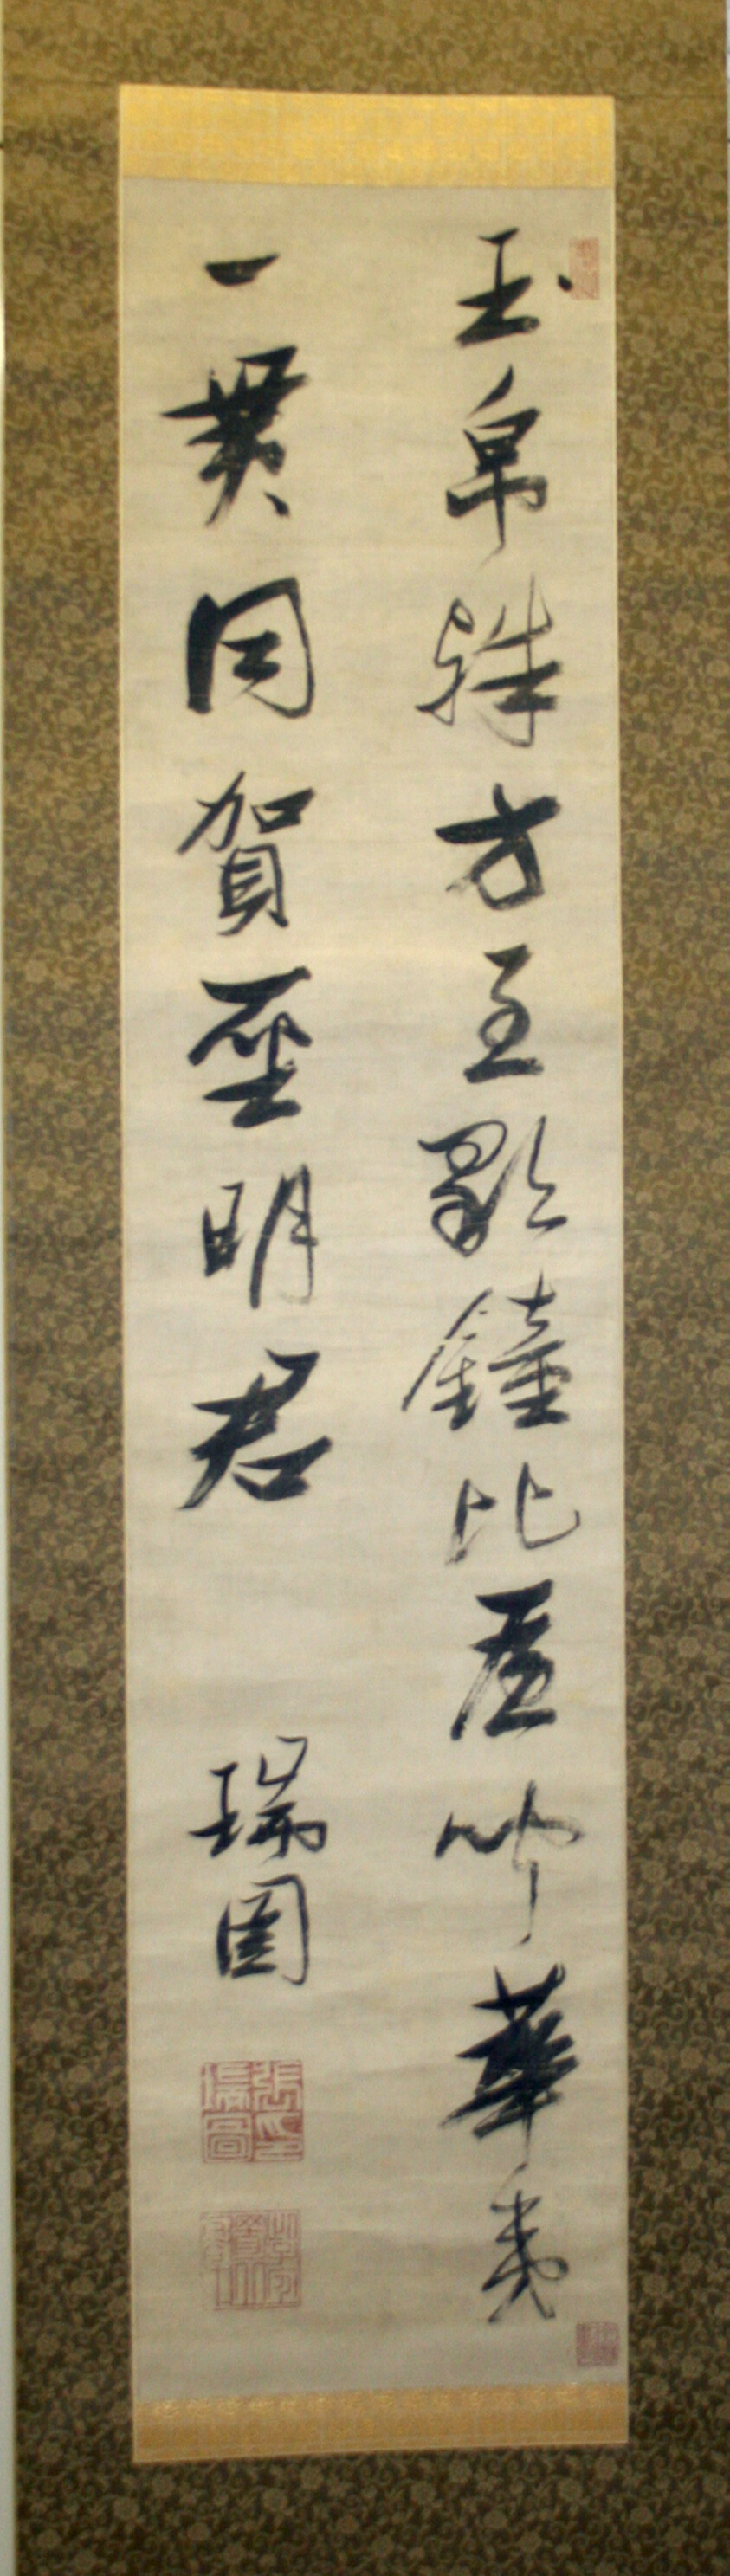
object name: Painting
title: Poem in Running Script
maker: Zhang Ruitu (Chinese, 1570–1641)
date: Ming Dynasty, 17th century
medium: Hanging scroll; ink on paper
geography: China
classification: hanging scroll; painting; asian art